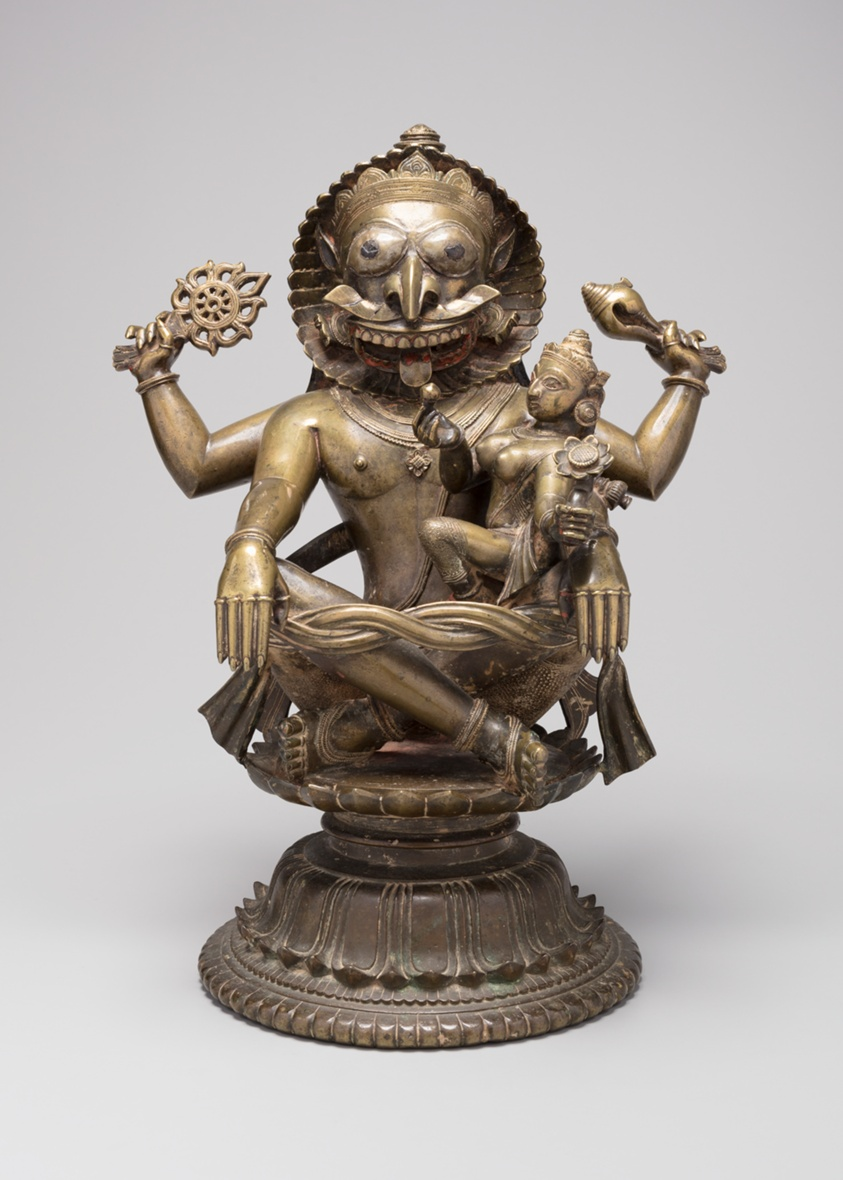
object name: Sculpture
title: Lion-Headed Incarnation of God Vishnu (Narasimha)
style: South Asian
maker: India; Orissa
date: c. 15th century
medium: Bronze with silver inlay and traces of pigment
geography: Odisha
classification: bronze; asian art; sculpture